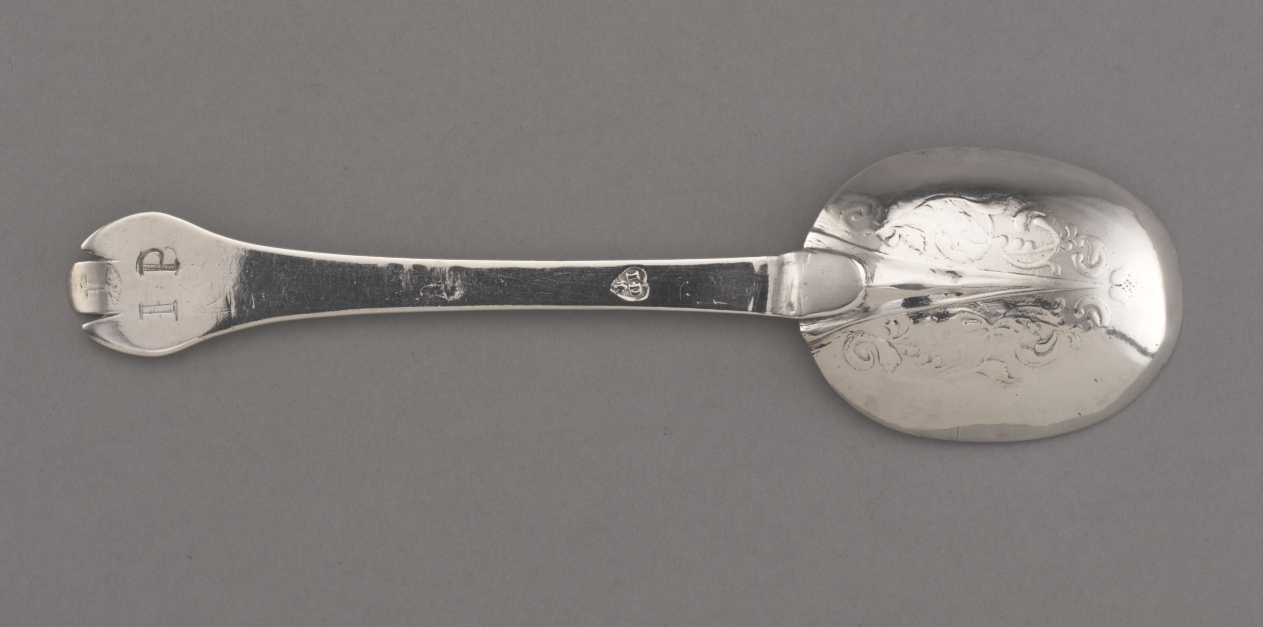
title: Spoon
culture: America, Massachusetts, Boston, late 17th Century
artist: Jeremiah Dummer (American, 1645–1718)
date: 1685–1700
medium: silver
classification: Silver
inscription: engraved in shaded block letters on back of handle end below punched device (sword in a stone?): I+P; in block letters on top of handle end: A.B.